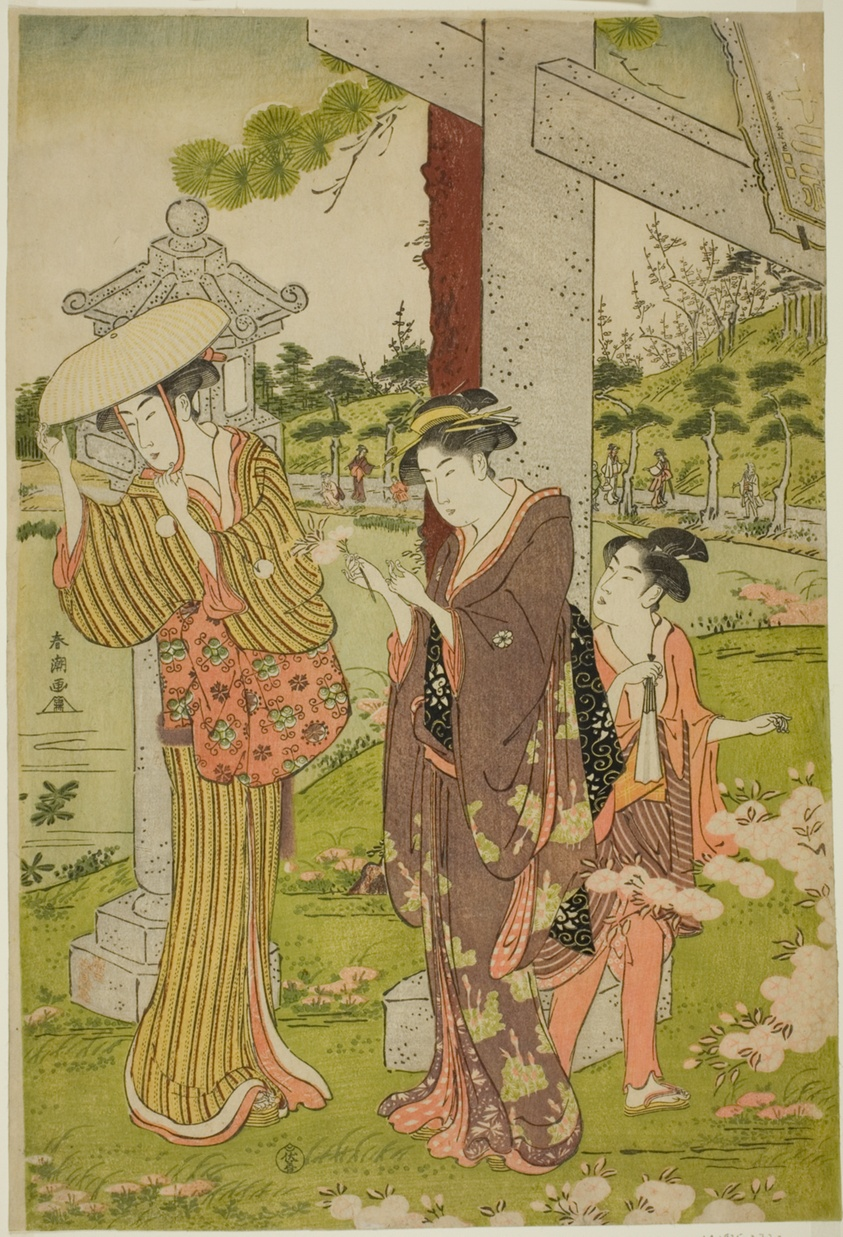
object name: Print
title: Picking Flowers at Kumano Junisha Shrine in Tsunohazu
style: Japanese (culture or style)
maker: Katsukawa Shuncho; Japanese, active c. 1780-1801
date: late 1780s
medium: Color woodblock print; right sheet of oban triptych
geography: Japan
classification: woodblock print; print; asian art